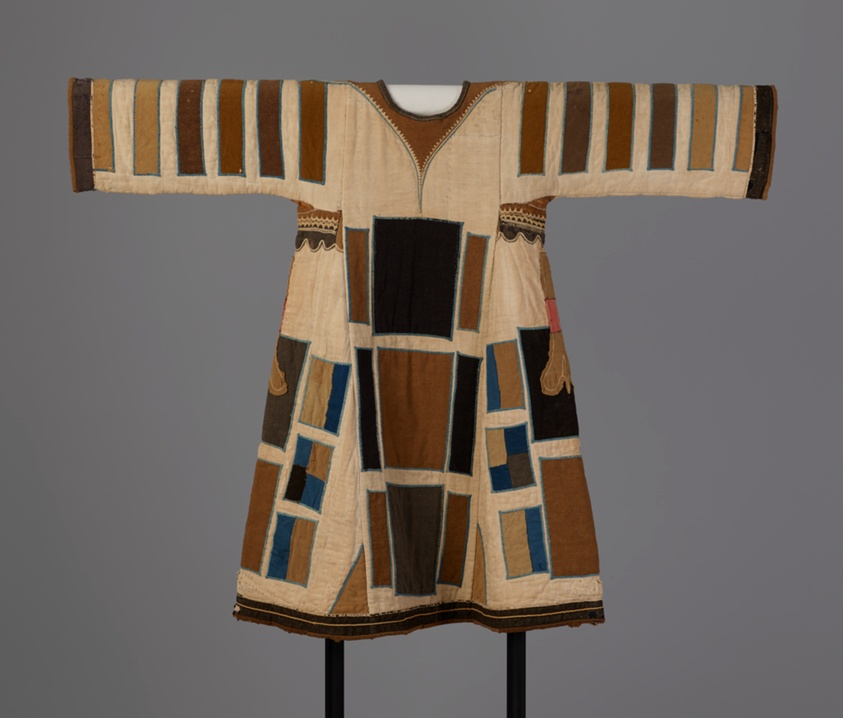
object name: Costume and Accessories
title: Tunic (Jibbeh)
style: Arts of Africa, 19th century, east african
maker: Mahdiyya State, Sudan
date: 1885/99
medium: Layers of cotton, plain weave; pieced and quilted; appliquéd with wool and wool and cotton plain weaves and wool twill weaves; embroidered with cotton in chain, cross, and a derivative of herringbone stitches; applied plied yarn edging; lined with cotton plain weaves; pieced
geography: Sudan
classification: tunic; arts of Africa; costume; garment; textile; dress (garment)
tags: garment, rectangles, black (color), tan (color), brown (color), lines, colonialism, Freedom, military, military uniforms, soldiers, uniforms